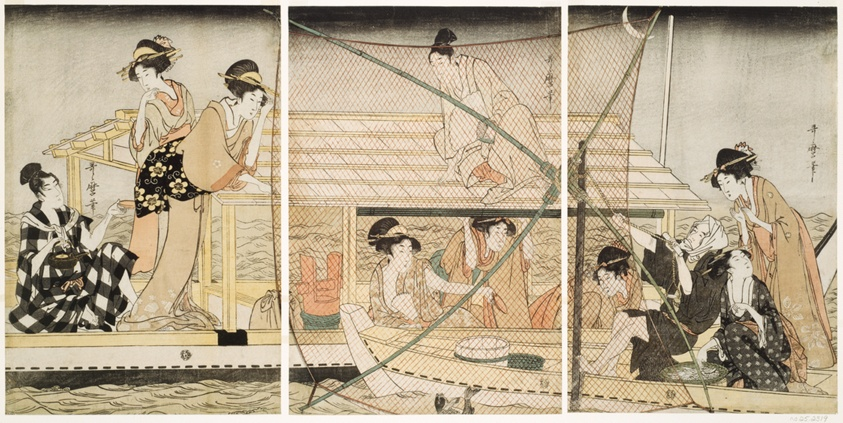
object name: Print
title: The Scoop-Net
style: Japanese (culture or style)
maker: Kitagawa Utamaro 喜多川 歌麿; Japanese, 1753 (?)-1806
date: c. 1800/01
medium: Color woodblock print; oban triptych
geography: Japan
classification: woodblock print; print; asian art